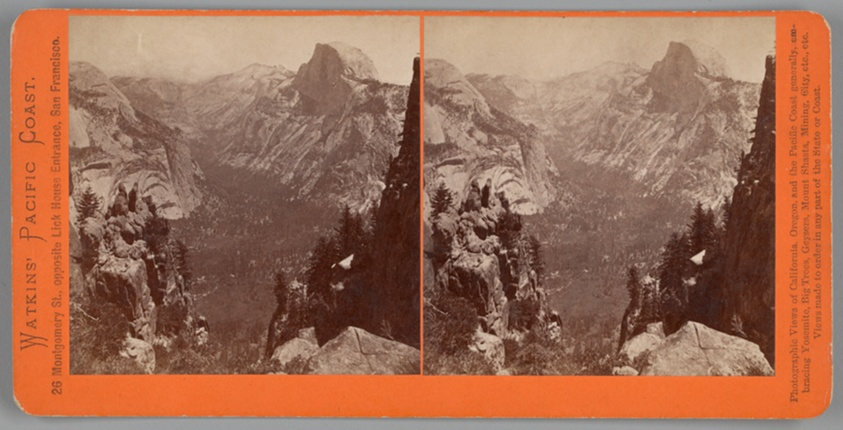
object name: Photograph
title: The Domes from Moran Point, Yosemite, from the series "Watkins' Pacific Coast"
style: 19th century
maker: Carleton E. Watkins; American, 1829-1916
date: 1861/76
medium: Albumen print, stereo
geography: United States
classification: stereograph (albumen); albumen silver print; photographic process; photography; photograph